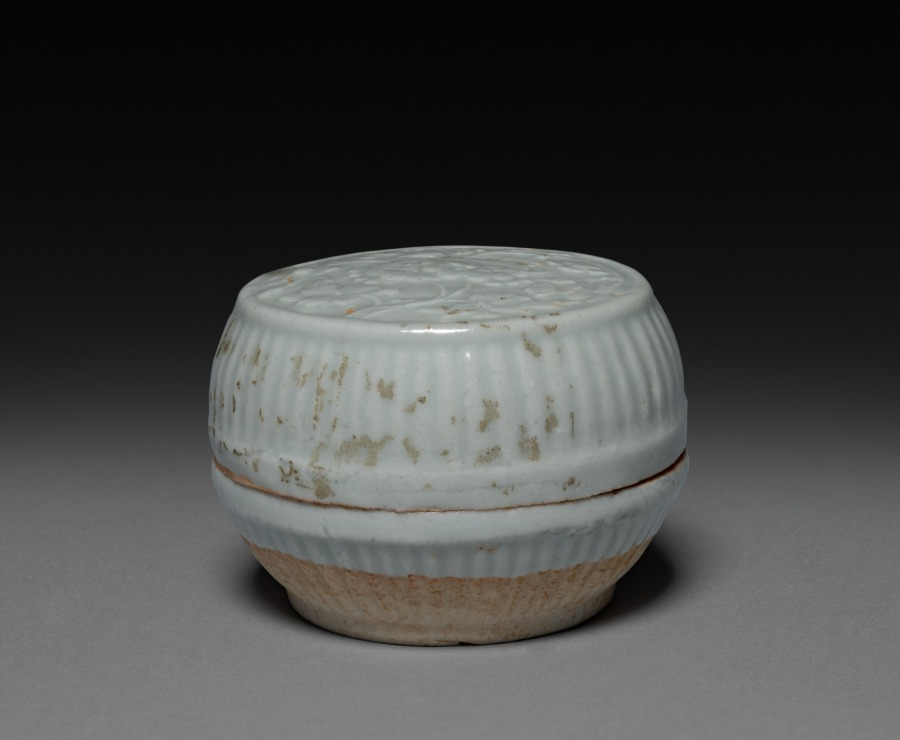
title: Circular Box: Qingbai Ware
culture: China, Southern Song Dynasty (1127-1279) - Yuan Dynasty (1271-1368)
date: 1200s-1300s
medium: glazed porcelain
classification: Ceramic